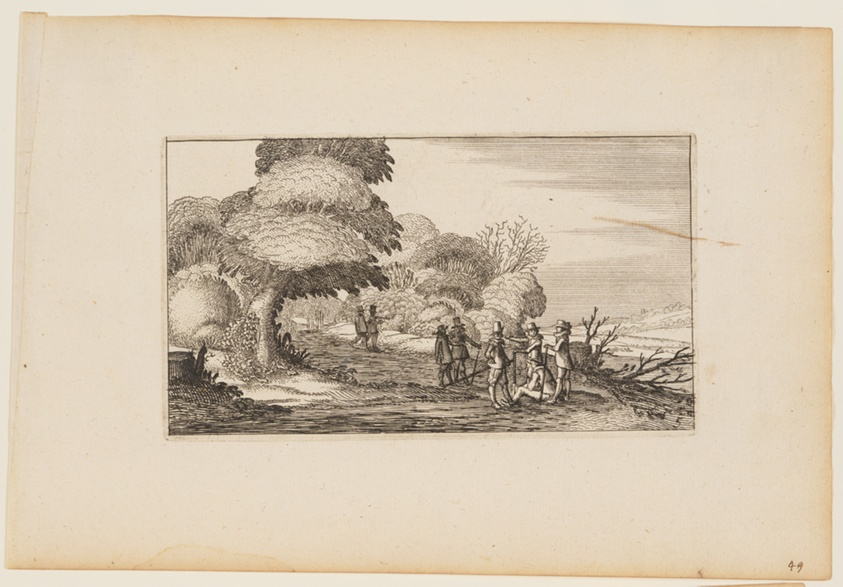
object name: Print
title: Men with Muskets on a Path leading through Woods, from Twelve landscapes with Figures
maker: After Gillis van Scheyndel; Dutch, 1595–1660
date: 1624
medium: Etching on ivory laid paper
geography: Netherlands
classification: etching; paper; print; prints and drawing